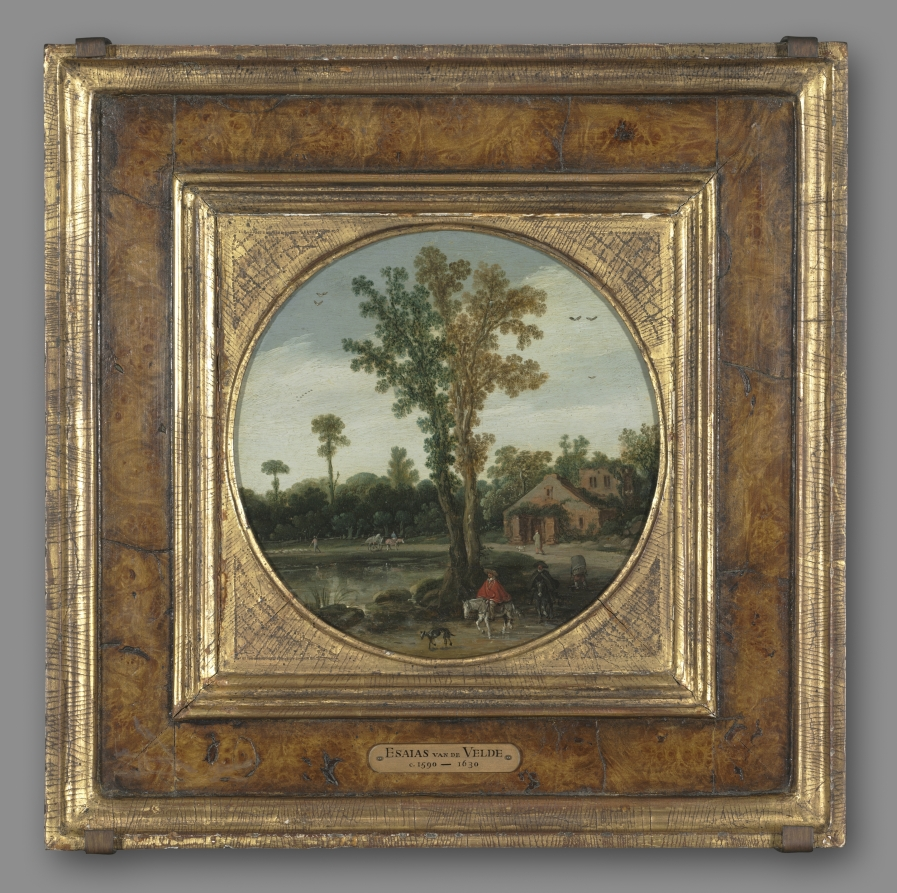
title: Travelers by a Lake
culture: Netherlands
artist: Esaias van de Velde (Dutch, 1587–1630)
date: 1625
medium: oil on wood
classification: Painting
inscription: signed lower center: E.V. Velde. / 1625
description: Prior to the early 1600s, Dutch artists typically painted landscapes as idealized or artificial backdrops to decorate the more important religious or mythological narratives they included. A revolution in landscape painting occurred in Haarlem in the 1610s when artists like Esaias van de Velde started to paint the humble and everyday subjects of the land and people of the Netherlands in convincingly naturalistic detail. The river view was a subject that van de Velde developed in the 1620s. While the water is subordinate to the other elements, its stillness reinforces the serenity of the environment, as do the figures and ruins that exist in in harmony with the natural world. Although van de Velde would have made sketches outdoors, the painting itself was not a copy of these sketches. Rather, as was the common practice, van de Velde would carefully construct paintings in his studio, using a combination of sketches and memories as his inspiration. For its owner, this picture would have satisfied an urban patron's nostalgia for the humble countryside, particularly in light of the rapid urbanization of Dutch society after their independence from Spain in 1609.